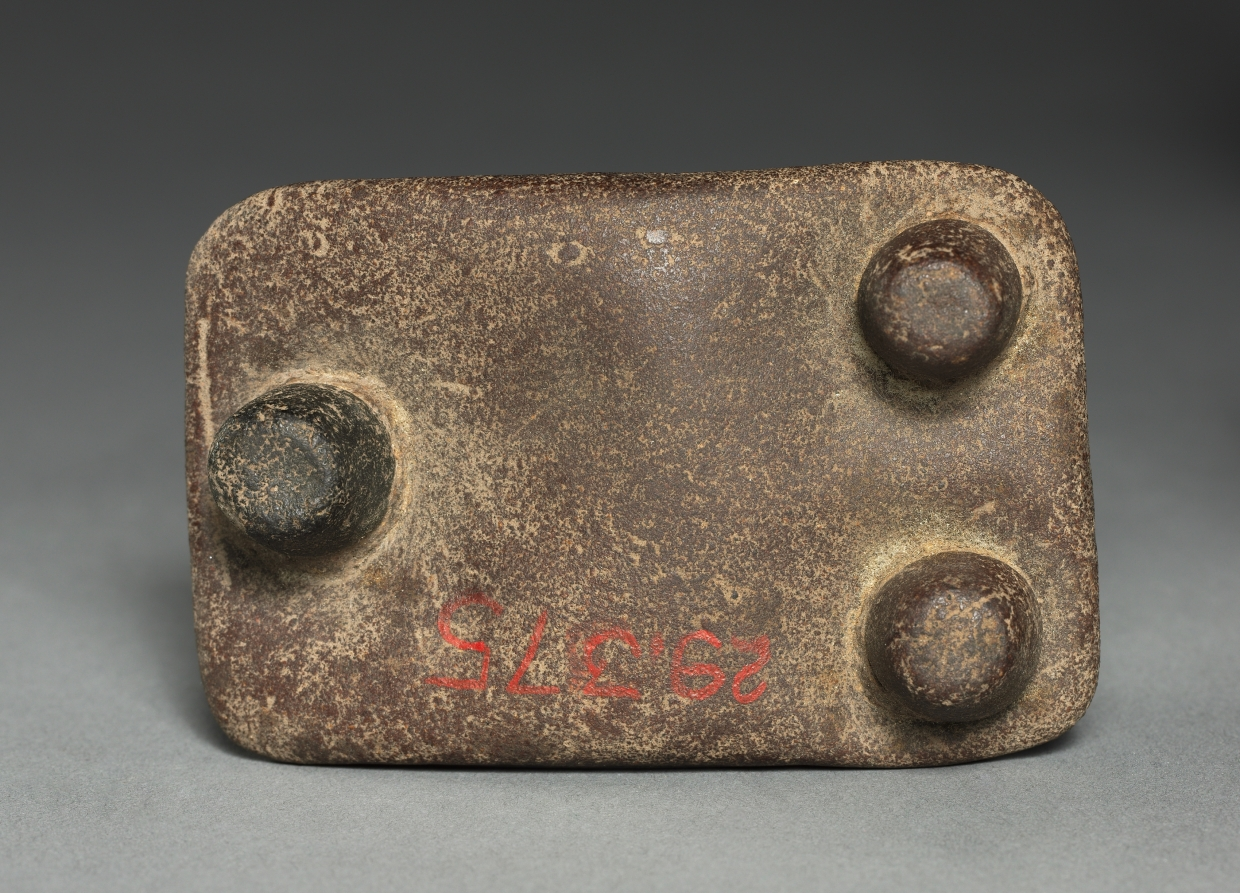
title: Toy Stone for Grinding Grain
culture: Mexico, Valley of Mexico (?), Aztec (?)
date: before 1929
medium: pottery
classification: Ceramic